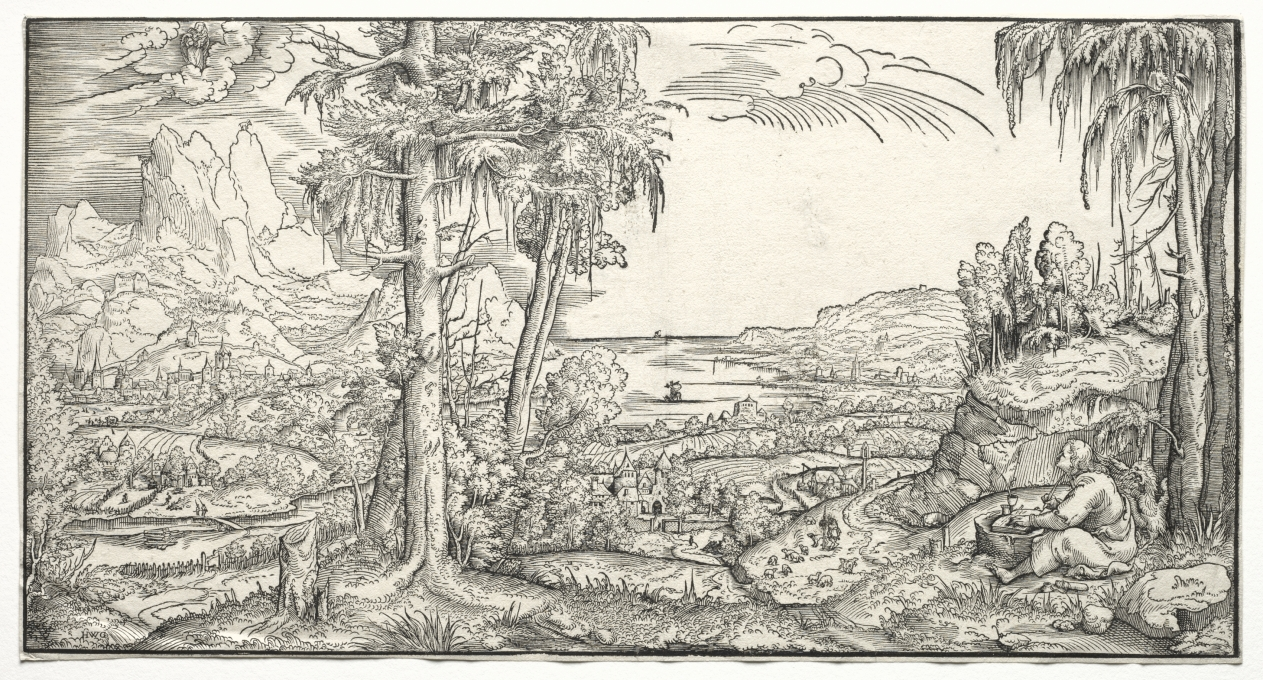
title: St. John on the Island of Patmos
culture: Germany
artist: Virgil Solis (German, 1514–1562)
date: c. 1545–55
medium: woodcut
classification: Print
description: Christian tradition says that after Christ’s death, John the Evangelist was exiled to the Aegean island Patmos, where he composed the Book of Revelation based on a series of prophetic visions. Here, Saint John gazes upward toward a vision of the woman of the apocalypse (traditionally interpreted as the Virgin Mary) in the top left corner. The artist’s composition implies that John’s vision was partially inspired by his isolation within nature—portrayed in a wide expanse featuring dramatic peaks and fir trees, castles, farms, shepherds, and even a merchant’s ship on a vast harbor.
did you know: In this setting intended to be the Greek island of Patmos, the saint sits among northern European trees and towns, and even a northern ship on the harbor.